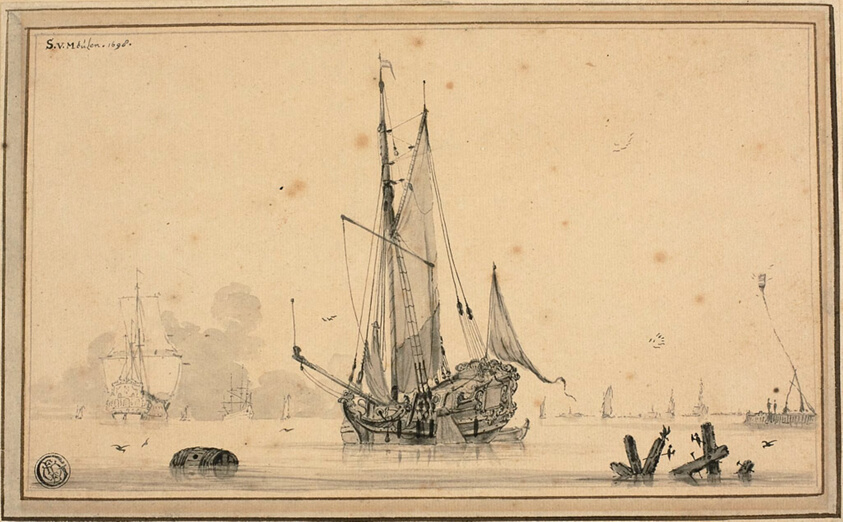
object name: Drawing and Watercolor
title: Harbor Scene with Ships at Rest and Piling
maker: Sieuwert van der Meulen (Dutch, c. 1698-1730)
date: 1698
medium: Brush and black ink and gray wash, with traces of graphite, on tan laid paper, laid down on tan wove card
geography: Netherlands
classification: ink or chalk wash; drawings (visual works); prints and drawing